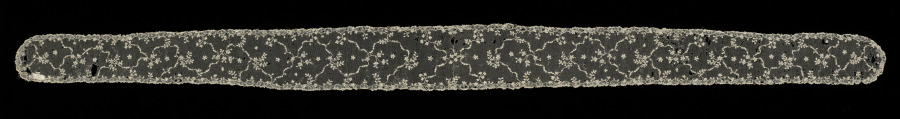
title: Lace Lappet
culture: France, Argentan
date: 1750–99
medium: Needle lace (Argentan)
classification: Lace